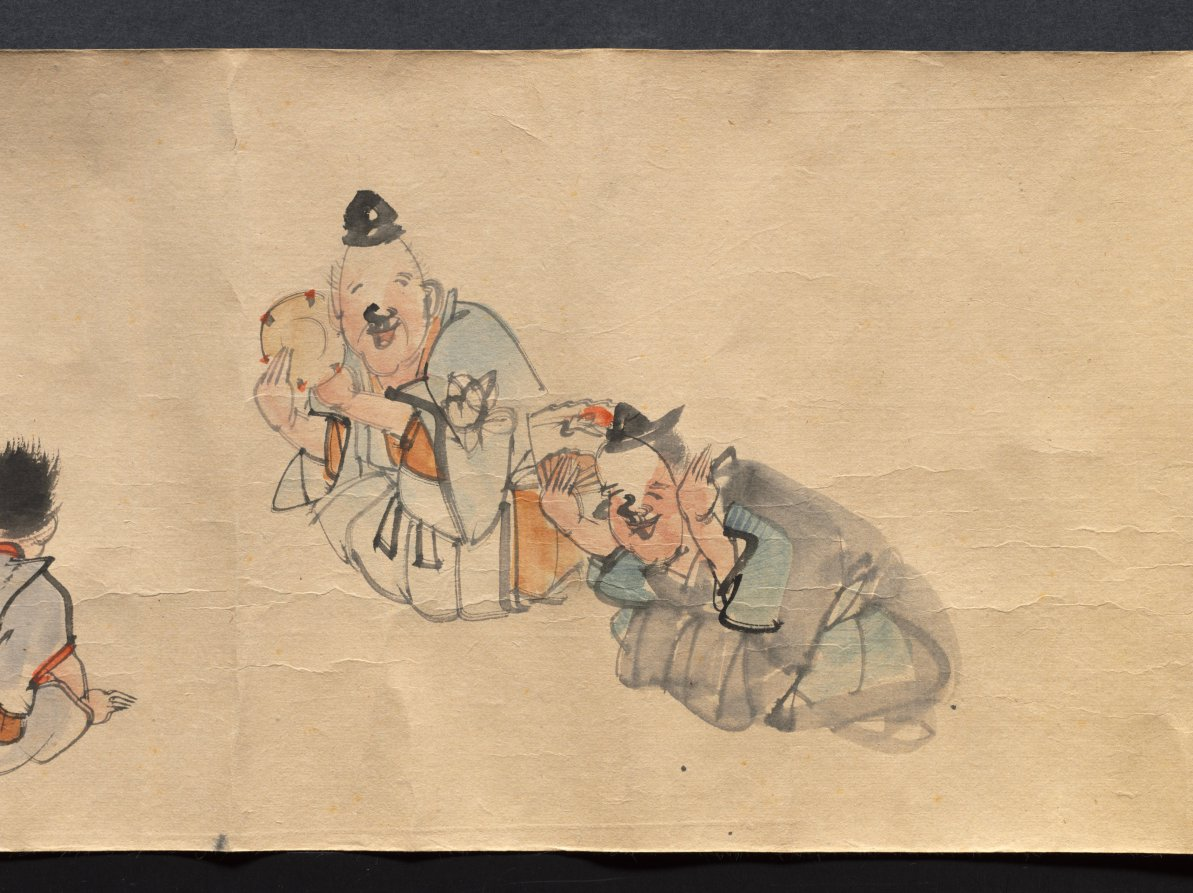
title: Festival Scenes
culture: Japan, Edo period (1615–1868)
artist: Suzuki Nanrei (Japanese, 1775–1844)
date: c. 1795–1844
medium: handscroll; ink and color on paper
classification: Painting